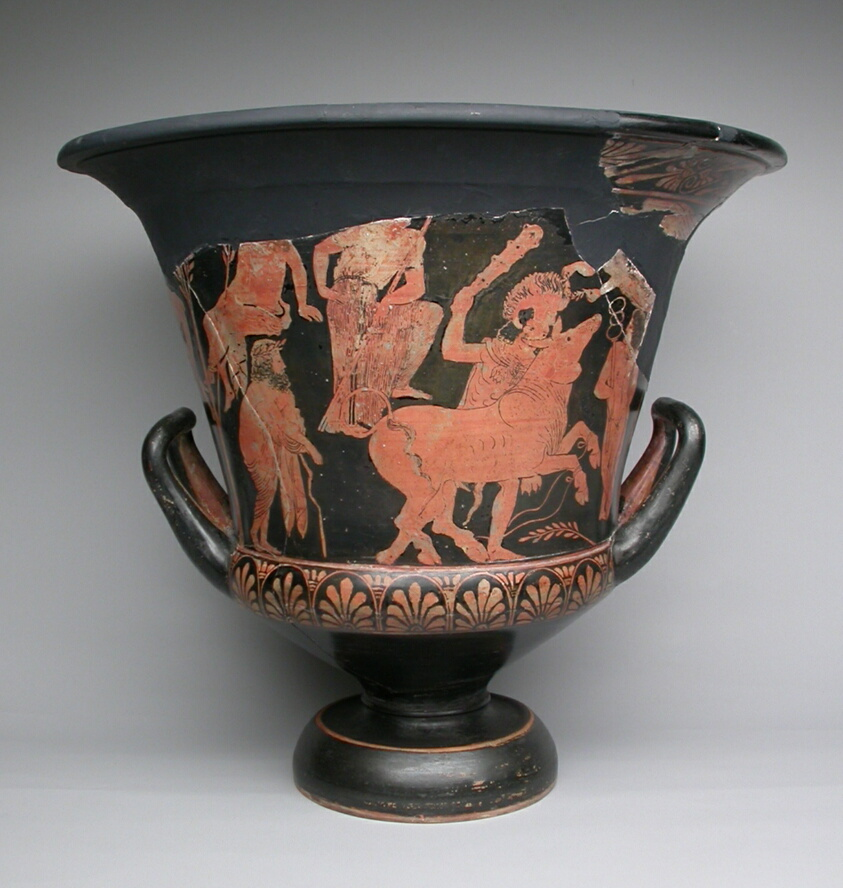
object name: Vessel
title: Calyx Krater (Mixing Bowl)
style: lucanian, south italian, red-figure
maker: Attributed to The Perugia Painter, now combined with the Arnò Painter; Etruscan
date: about 400-380 BCE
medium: terracotta, red-figure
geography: Basilicata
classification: vessel; earthenware; ceramics; ancient art